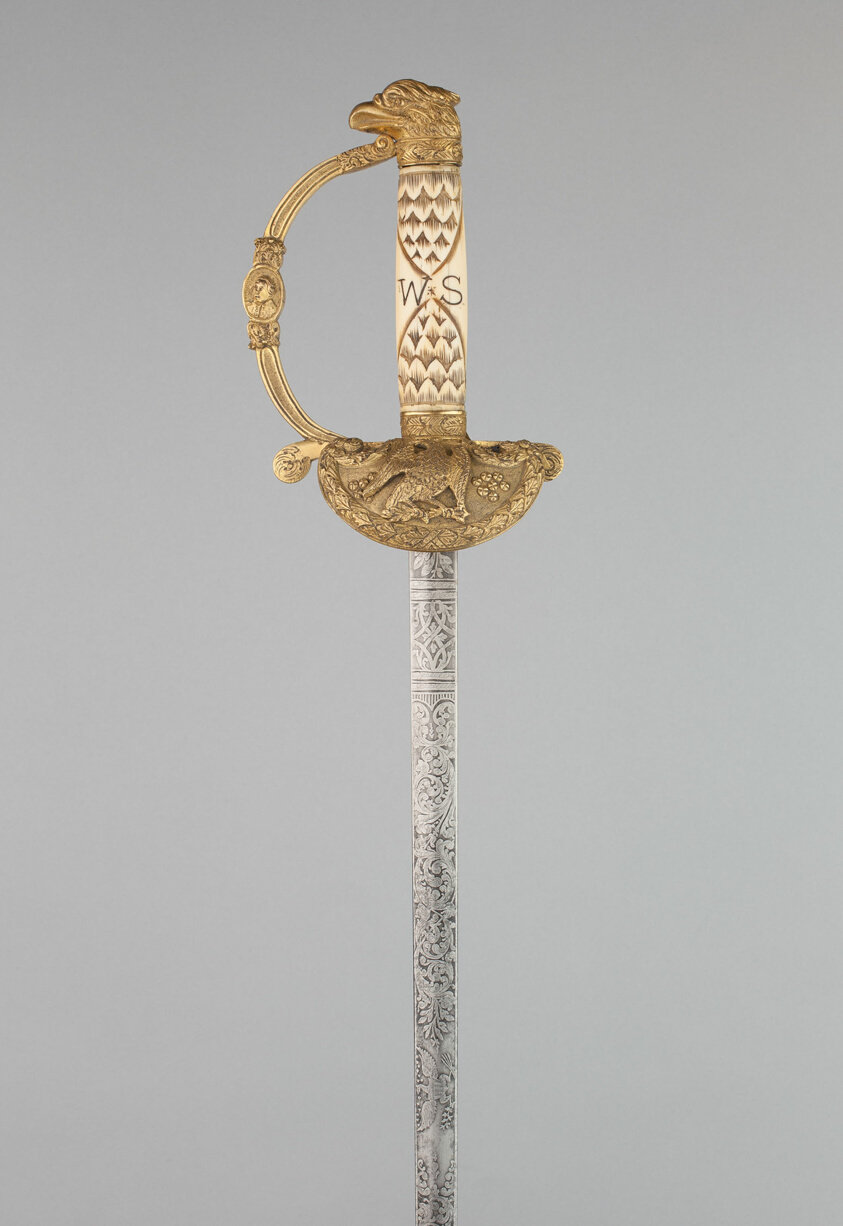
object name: Arms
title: Sword of Winthrop Sargent (1753-1820), First Governor of Northwest Territories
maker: English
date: c. 1800/10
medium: Steel, brass, and ivory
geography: England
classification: edged weapon-sword; arms; arms and armor